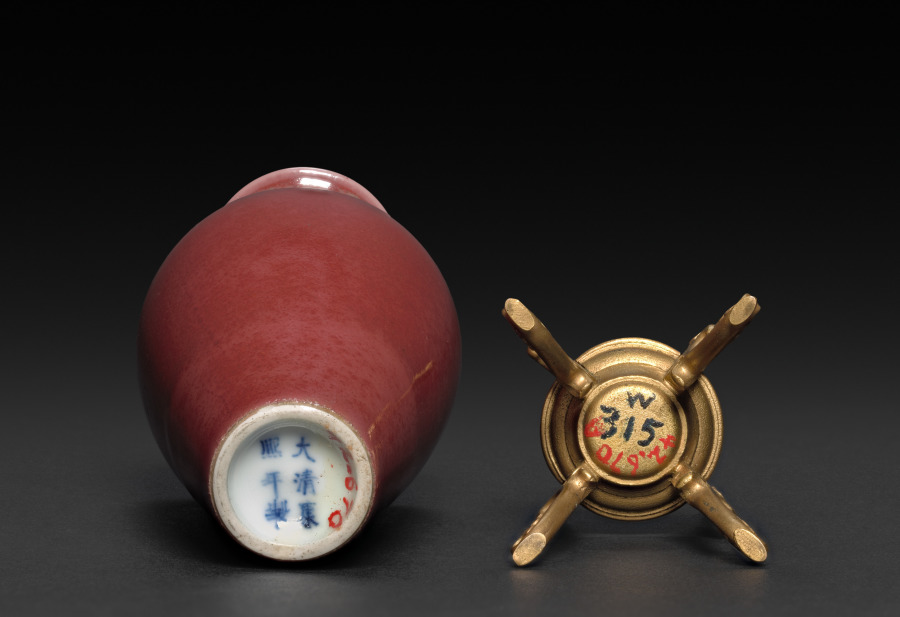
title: Bottle with Peach Bloom Glaze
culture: China, Qing dynasty (1644-1911), Kangxi reign (1661-1722)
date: 1662–1722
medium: porcelain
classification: Ceramic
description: The "peach-bloom" glaze developed during the Kangxi era has also been described as "drunken with beauty." Technical achievements were transcended with aesthetic associations, revealing the greatest sensitivity to all things beautiful in nature.